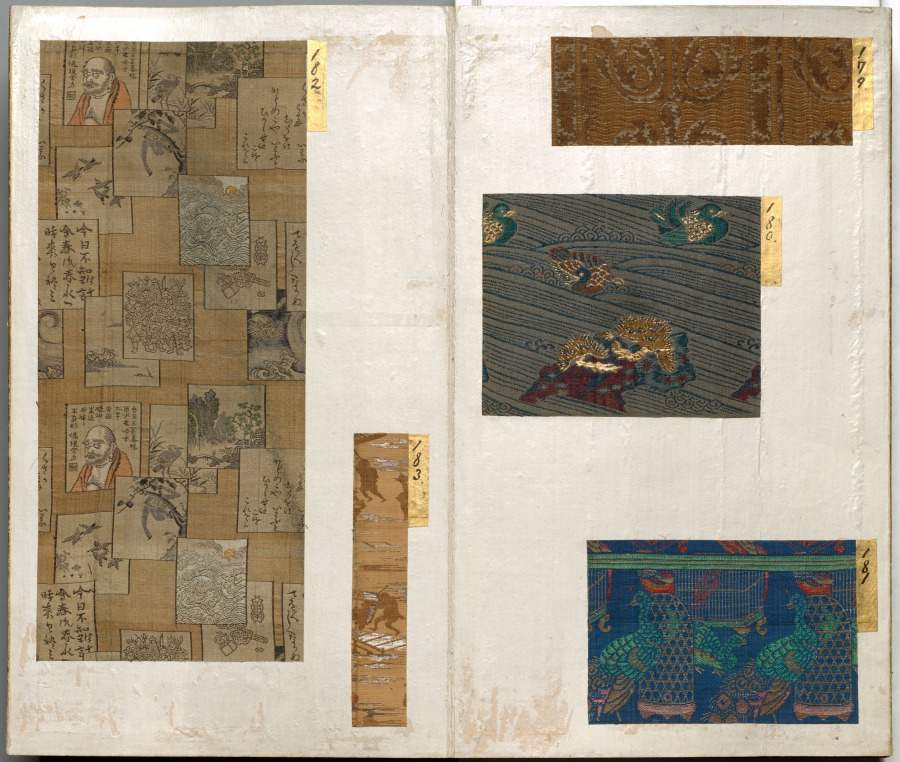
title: Album of Textile Samples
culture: Japan, Edo period (1615–1868)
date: 1600s-1700s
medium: silk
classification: Textile